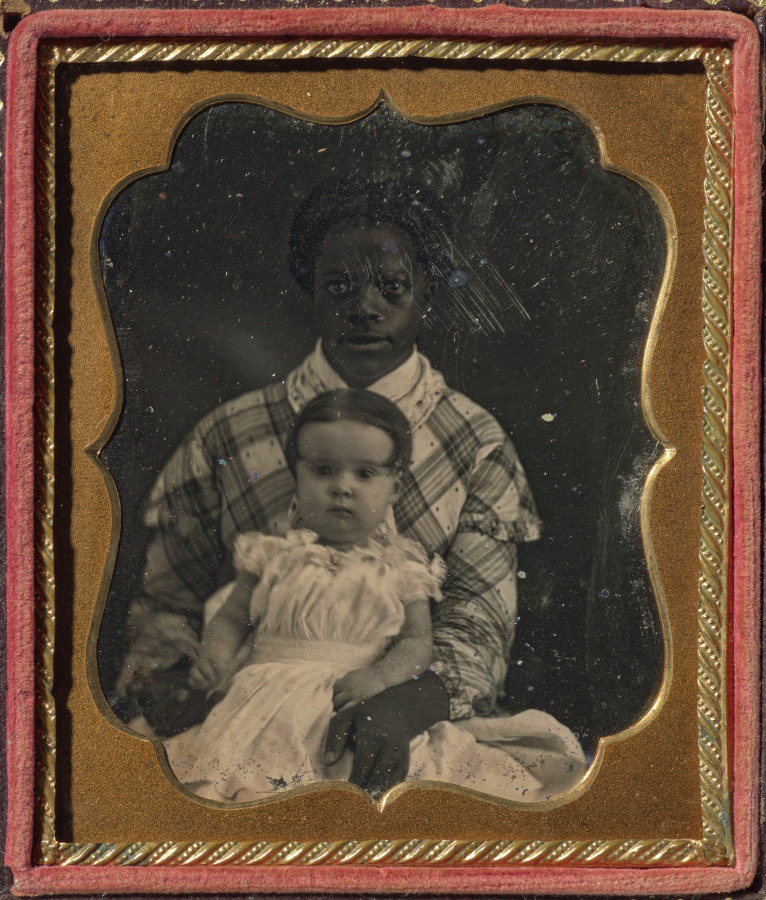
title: Black Woman and White Child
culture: America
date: c. 1855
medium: daguerreotype, sixth plate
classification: Photograph